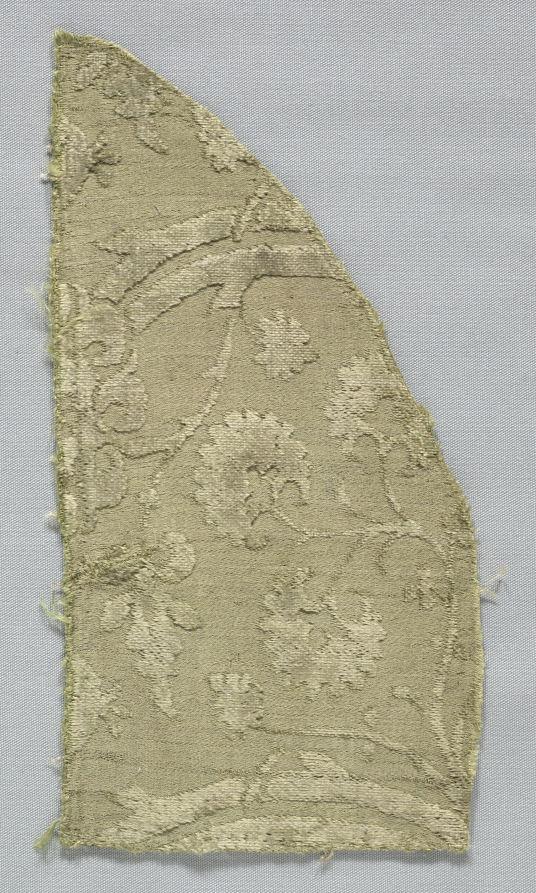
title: Fragment of a Chasuble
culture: Italy, beginning of the 15th century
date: 1400–1420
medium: velvet (cut and voided); silk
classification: Velvet